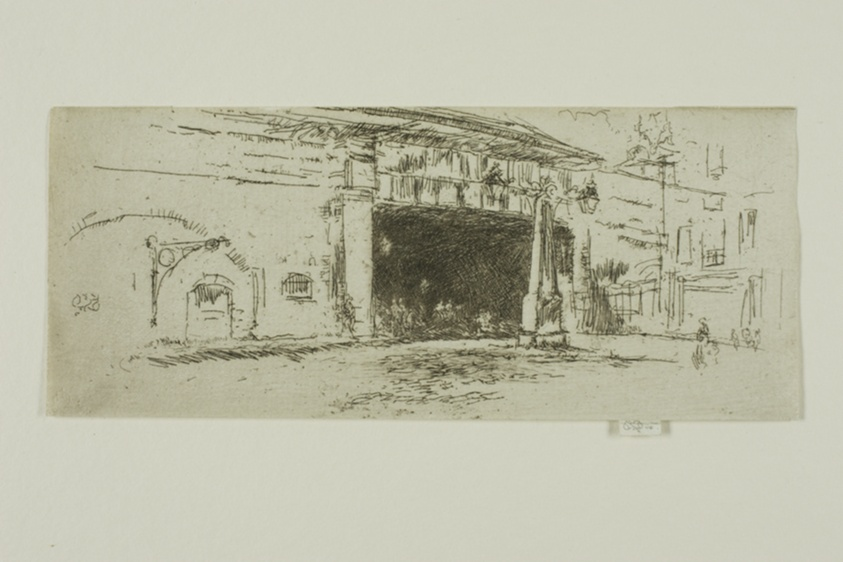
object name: Print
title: Railway Arch, American Square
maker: James McNeill Whistler (American, 1834-1903)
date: 1887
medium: Etching with foul biting in black ink on off-white laid paper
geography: United States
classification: etching; foul biting; print; prints and drawing; paper